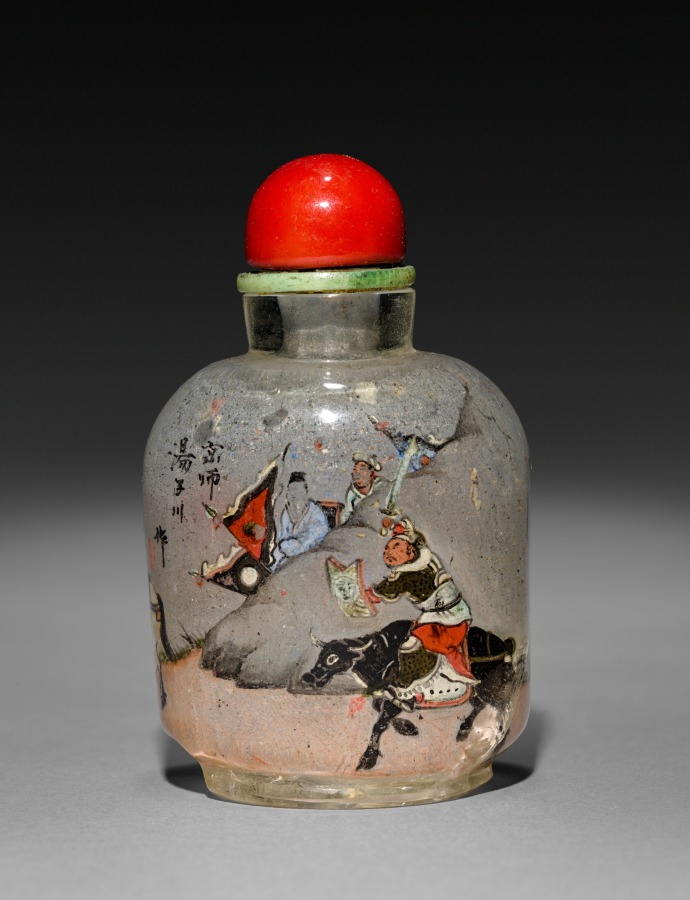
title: Snuff Bottle with Stopper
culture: China, Qing dynasty (1644-1911)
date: 1800s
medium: glass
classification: Glass